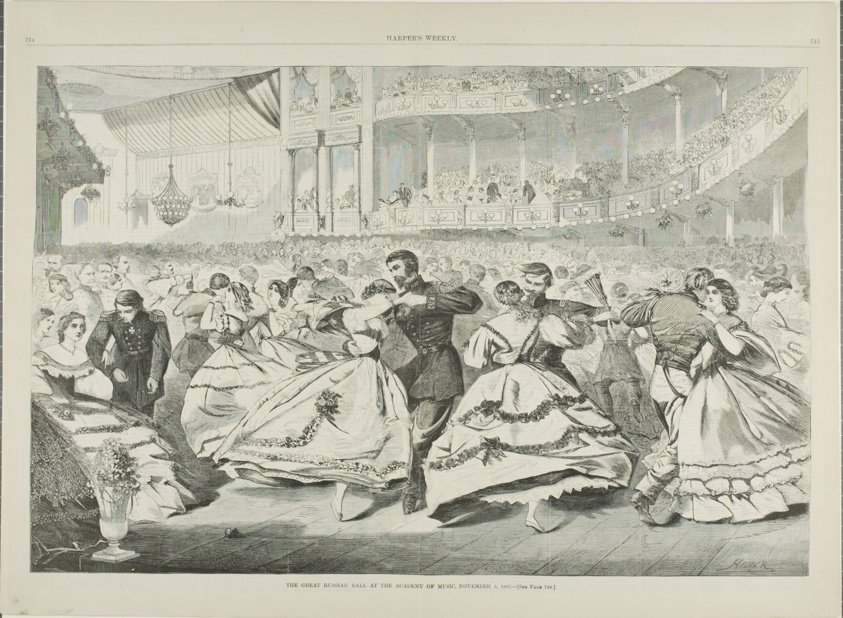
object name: Print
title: The Great Russian Ball at the Academy of Music, November 5, 1863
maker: Winslow Homer (American, 1836-1910); published by Harper's Weekly (American, 1857-1916)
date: published November 21, 1863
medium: Wood engraving on buff wove paper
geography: United States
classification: wood engraving; print; prints and drawing